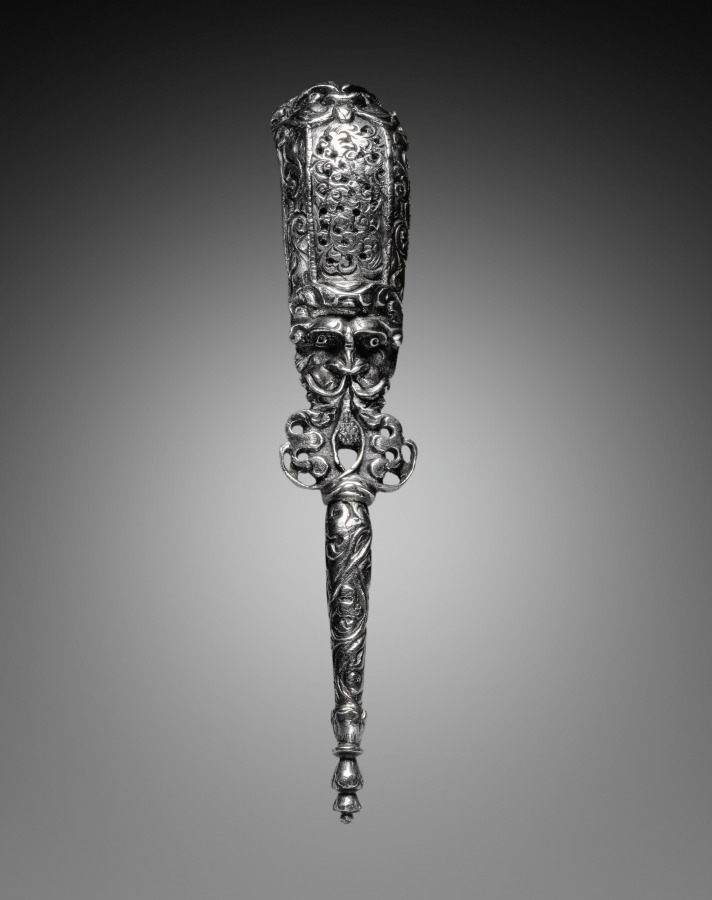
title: Trigger Guard for a Pistol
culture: Italy, Brescia (?), late 17th Century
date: c. 1680–1700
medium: chiseled steel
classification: Arms and Armor